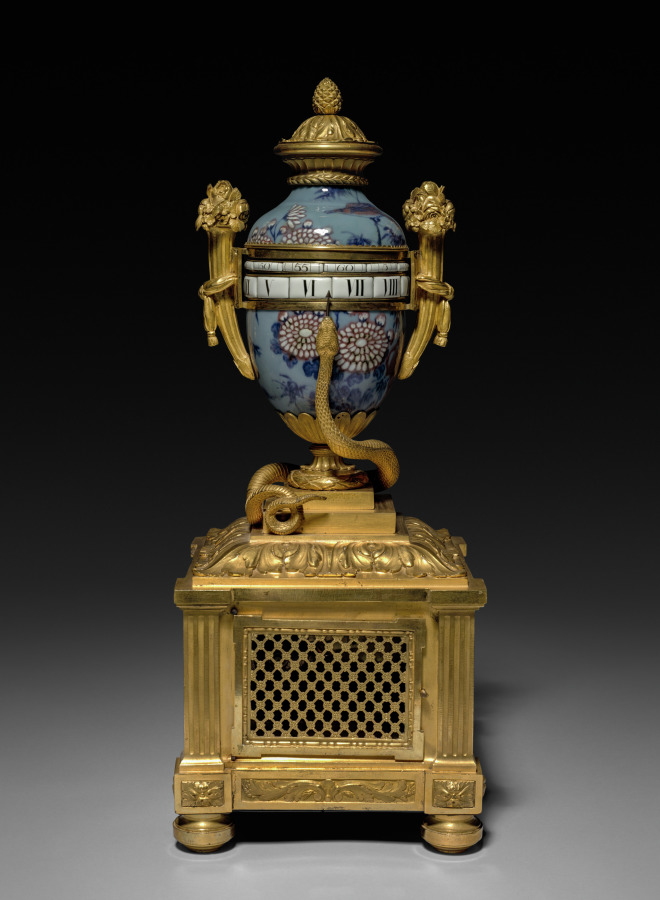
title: Clock for a Garniture Set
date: 1736–1770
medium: Chinese hard-paste porcelain, gilt bronze, enameled metal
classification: Furniture and woodwork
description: The fascination with Chinese porcelain among aristocratic circles increased during the reign of Louis XV. In reaction to the perceived excesses of elaborate naturalistic ornament of the 1750s, mount makers increasingly turned to neoclassical designs, known as Goût Grec (Greek taste) in the 1760s and 1770s. These beautifully chased gilt-bronze mounts feature classical Greco-Roman motifs such as lion masks, acanthus and laurel leaves, and pilasters.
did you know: A set of vases and clock, connected visually by the use of the same materials, often adorned a mantlepiece or the top of a large piece of furniture, such as a commode or console, within a room.